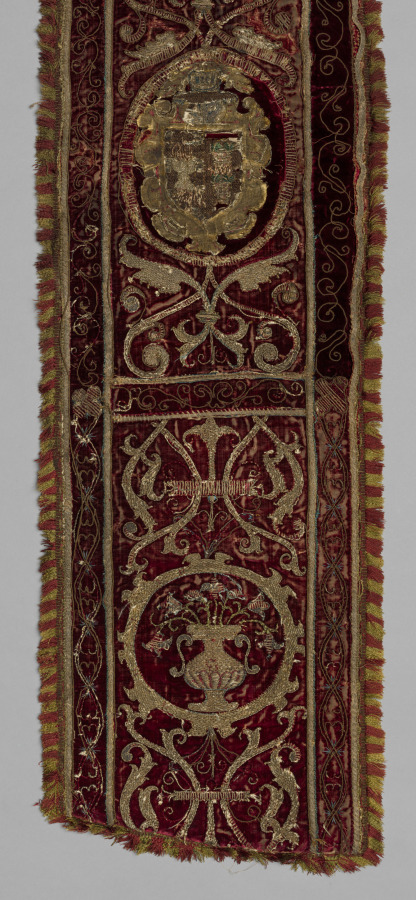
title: Embroidered Strip of Velvet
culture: Spain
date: 1500s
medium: embroidery: silk and gold thread on velvet, fringe border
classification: Velvet